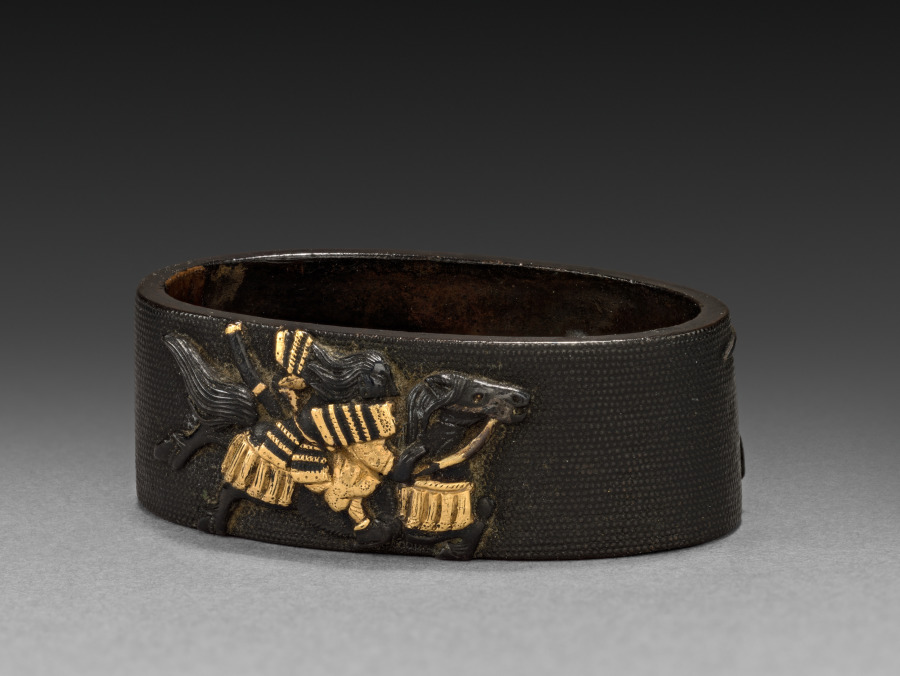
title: Sword-Hilt Collar (Fuchi)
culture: Japan, Edo period (1615–1868)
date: 1700–1850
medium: shakudo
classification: Arms and Armor